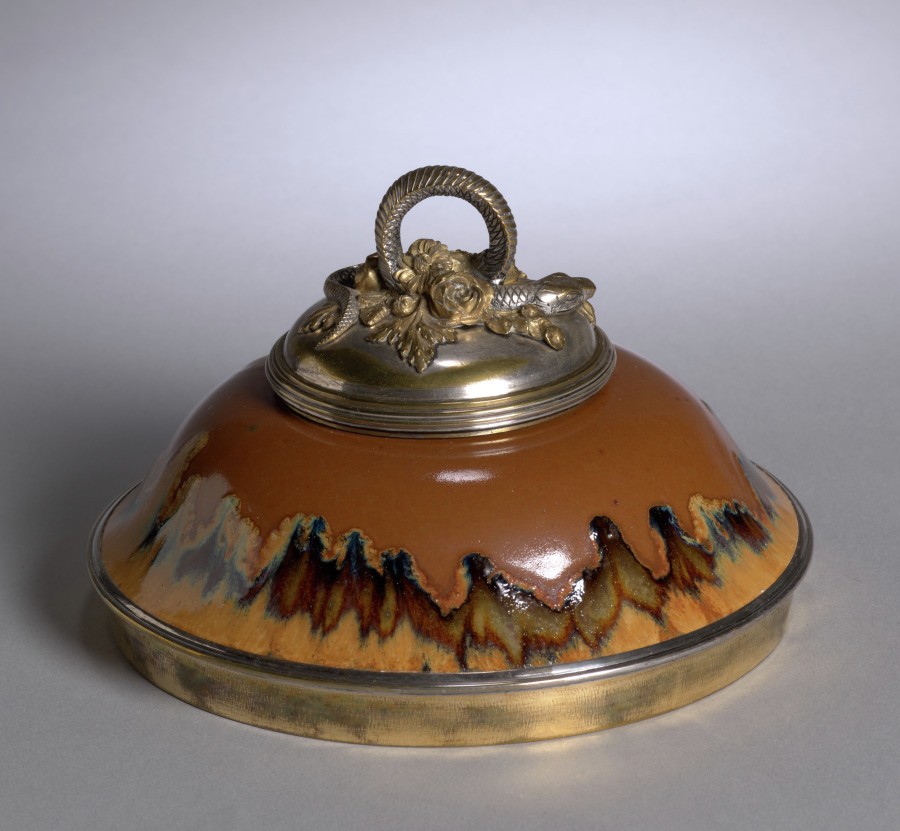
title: Cover for a Bowl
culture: France, late 19th-early 20th Century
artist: Auguste Delaherche (French, 1857–1940)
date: c. 1899–1900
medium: stoneware with metal mounts, silvered and gilded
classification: Ceramic